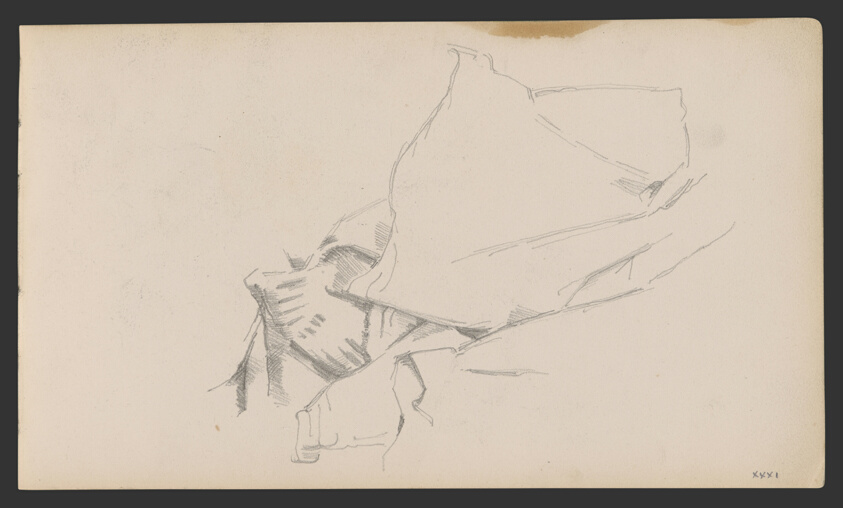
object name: Drawing and Watercolor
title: Sketchbook No. 2 (L'Estaque)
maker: Paul Cézanne; French, 1839-1906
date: 1875–86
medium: Graphite and pen and ink drawings on paper, bound into a book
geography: France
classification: sketchbook; graphite; prints and drawing; paper